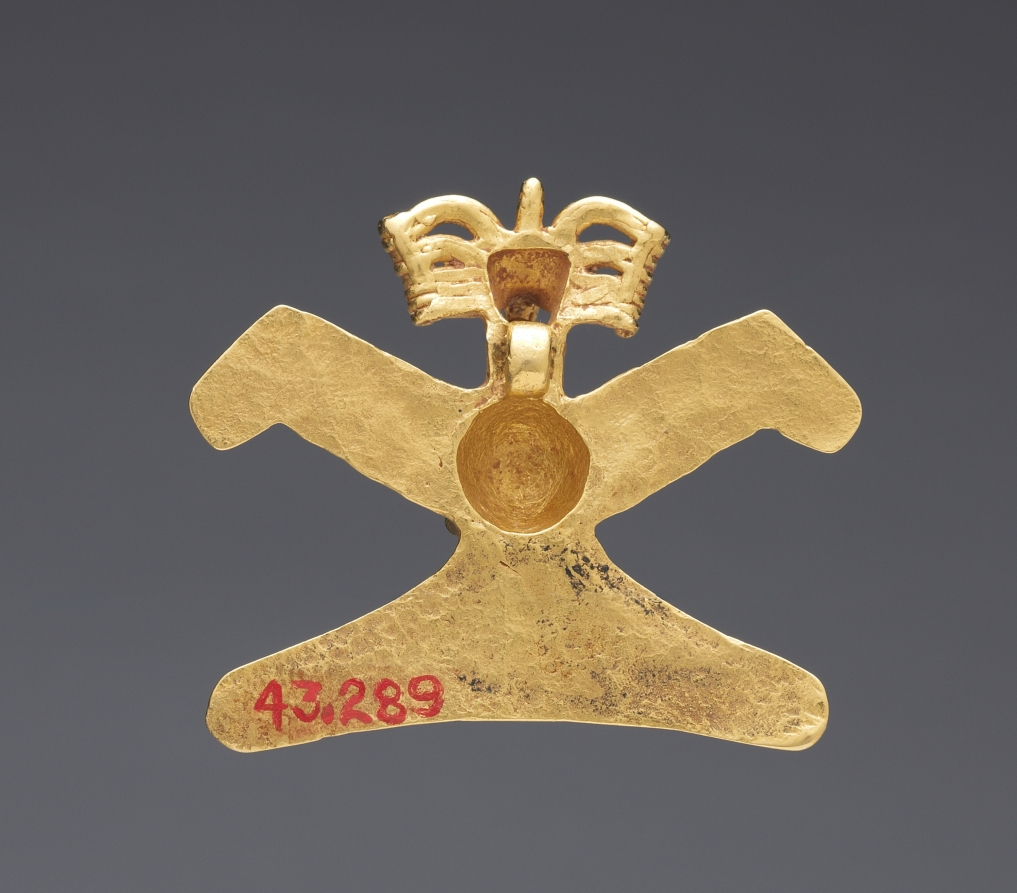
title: Bird Pendant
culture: Panama, Veraguas-Chiriquí style, 10th-16th century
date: c. 1000–1550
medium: cast gold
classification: Metalwork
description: The kinds of birds represented in pendants of the isthmus are not clear, though the emphasis on spread wings and flight suggests birds that soar, such as eagles or hawks. In addition to their aerial agility, they are powerful birds of prey and, therefore, may have symbolized a warrior's or hunter's ferocity and skill. They were also often linked to the sun. Better understanding is difficult because the makers created no written records.